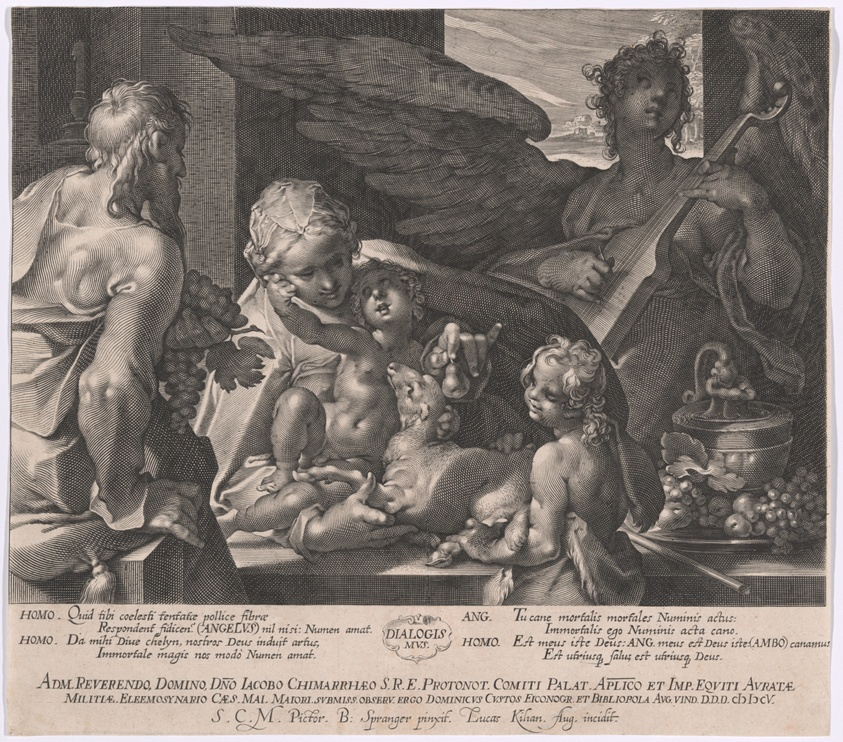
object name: Print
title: The Holy Family with the Young John the Baptist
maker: Lucas Kilian (German, 1579-1637); after Bartholomeus Spranger (Flemish, 1546-1611)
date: 1605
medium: Engraving in black on cream laid paper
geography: Germany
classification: prints and drawing; paper; engraving; print